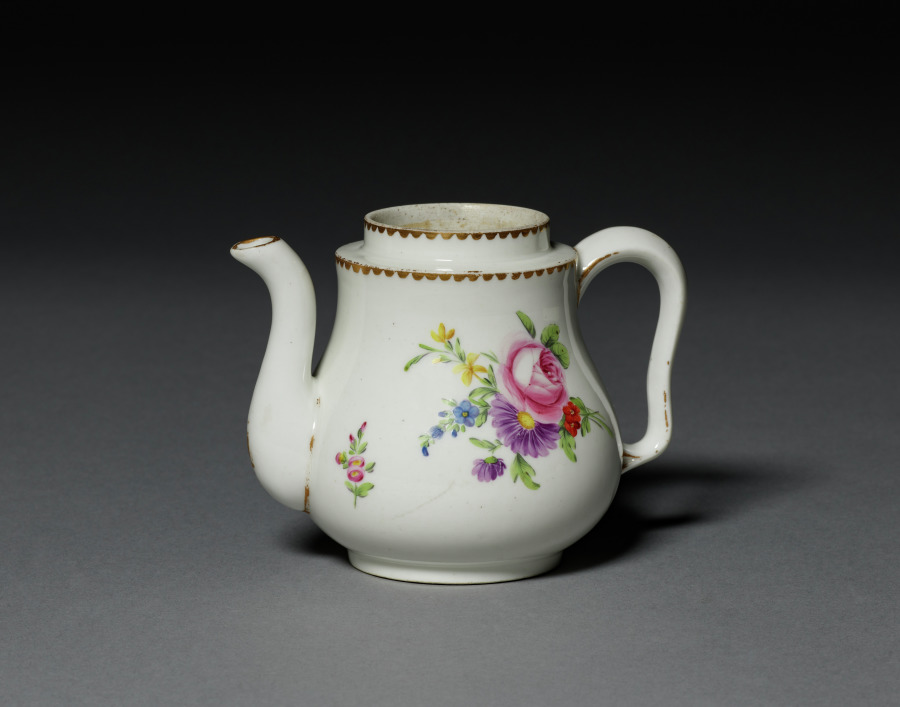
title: Teapot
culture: France, Paris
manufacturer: Rue Thiroux Factory (French)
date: c. 1780s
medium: hard-paste porcelain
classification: Ceramic